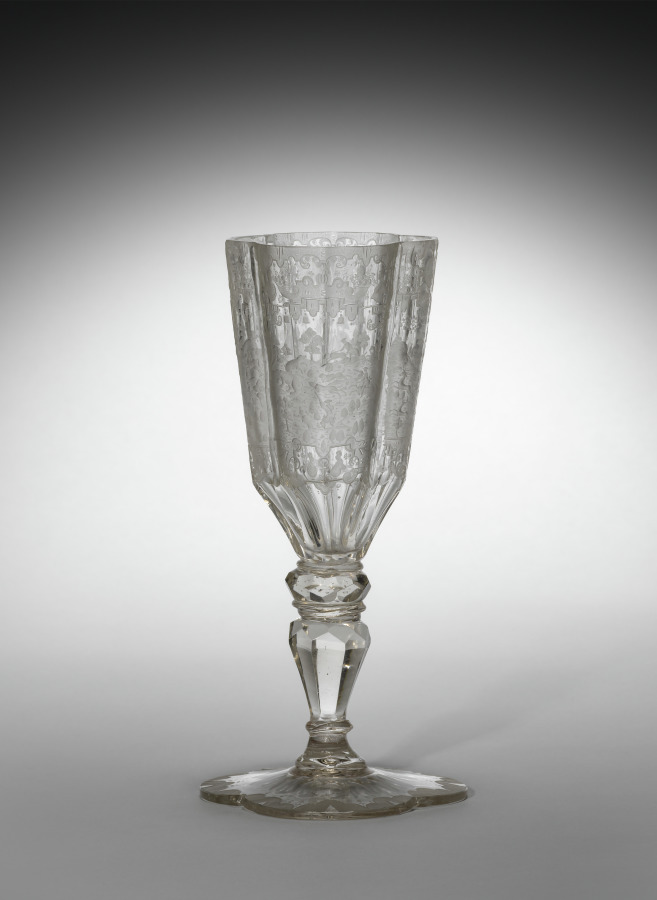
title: Standing Cup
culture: Germany, Silesia, 18th century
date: c. 1725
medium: glass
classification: Glass